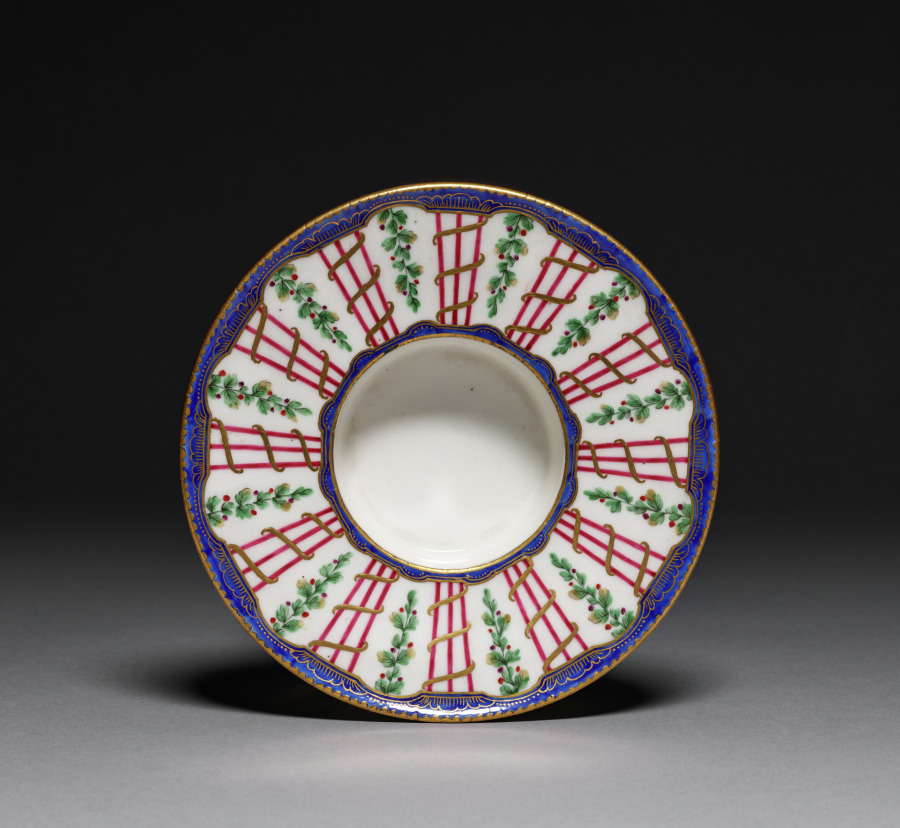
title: Saucer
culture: France, Sèvres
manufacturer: Sèvres Porcelain Factory (French, est. 1756)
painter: Louis-Jean Thévenet pere (French, 1708-)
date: 1764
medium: soft-paste porcelain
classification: Ceramic